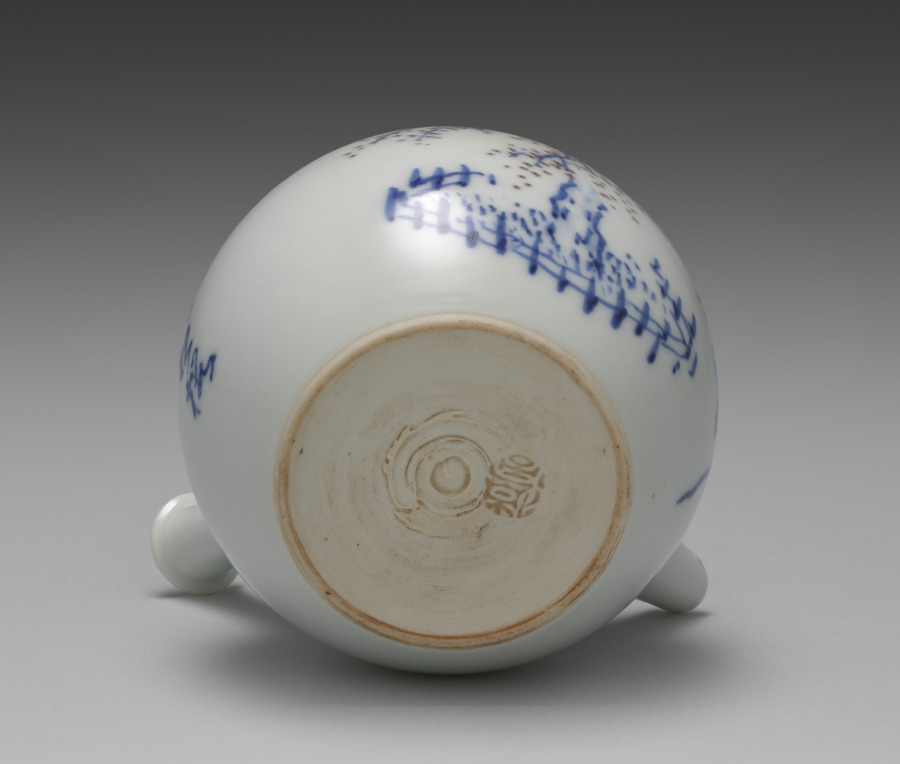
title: Teapot with Cherry at Night in Gion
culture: Japan, Meiji period (1868–1912)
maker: Seifū Yohei III (Japanese, 1851–1914)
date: 1893–1914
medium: Porcelain with underglaze blue and iron oxide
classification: Ceramic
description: This side-handled sencha teapot with the cherry tree has a nearly spherical shape, and its recessed lid has an ovoid knob. It has both blue and a purplish brown under the glaze for the blossoms and embers on one side, and the vertical calligraphy identifies the tree as a cherry tree at night in the Gion area of Kyoto. To the right of the tree, smoke billows from a small lantern fire in a basket suspended on a post. In terms of collecting history, a paper inserted into the box of Teapot with Cherry at Night in Gion is of interest. It is a flyer for Yamamoto Shōseidō, a shop (no longer extant) that sold fine Kyoto ceramics in Osaka.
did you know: This teapot features the Japanese theme of a blossoming cherry tree in the Gion area of Kyoto in underglaze blue and brown.